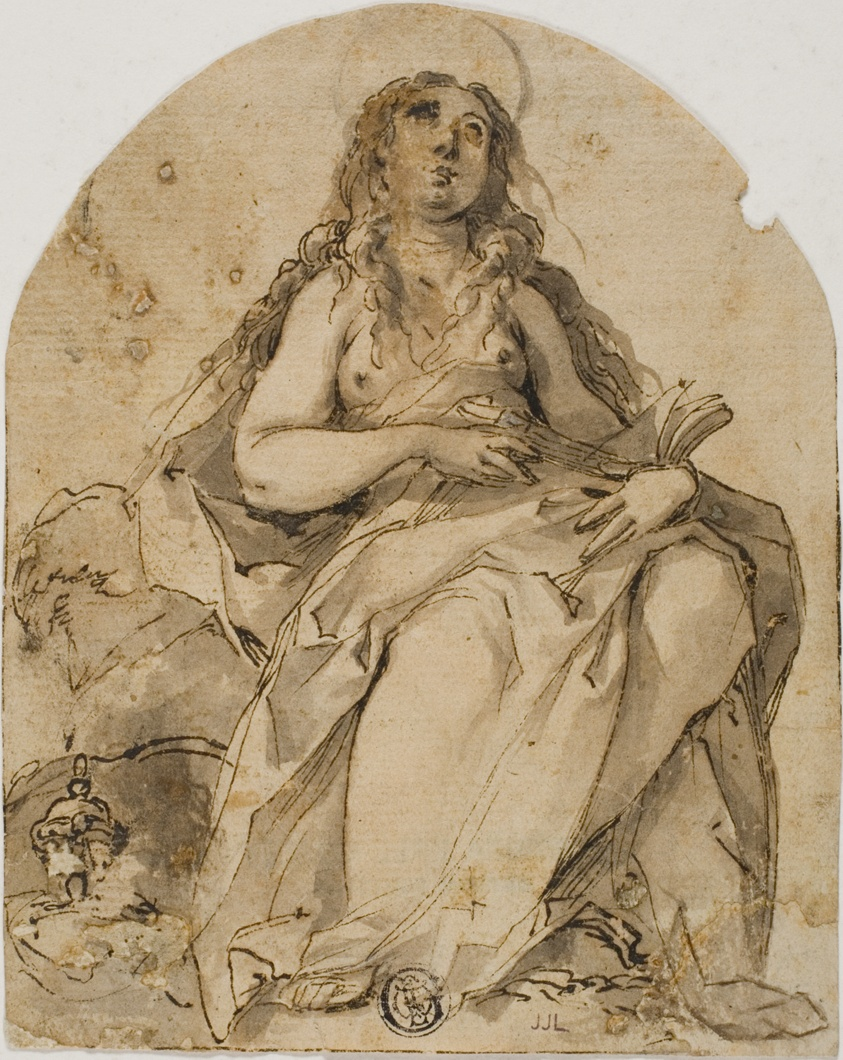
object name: Drawing and Watercolor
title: Mary Magdalene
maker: Possibly a follower of Giovanni Battista Gaulli (Italian, 1639-1709); or Domenichino (Italian, 1581-1641); or the circle of Taddeo Zuccaro (Italian, 1529-1566); or the style of Giovanni Baglione (Italian, 1573-c. 1644)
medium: Pen and brown ink, with brush and brown wash, on cream laid paper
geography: Italy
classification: pen and ink drawings; drawings (visual works); prints and drawing